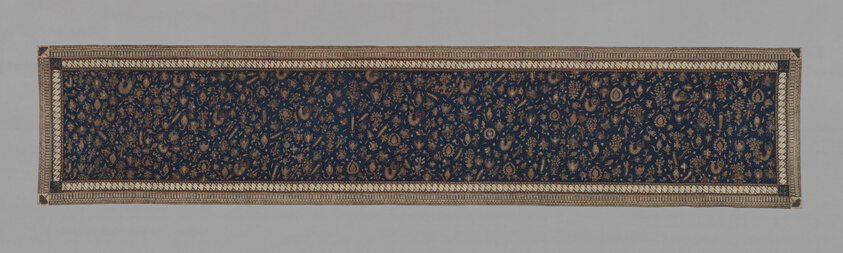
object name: Textile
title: Hanging /Sash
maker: Indonesia, Java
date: 19th century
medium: Batik dyed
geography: Java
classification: textile; weaving; costume